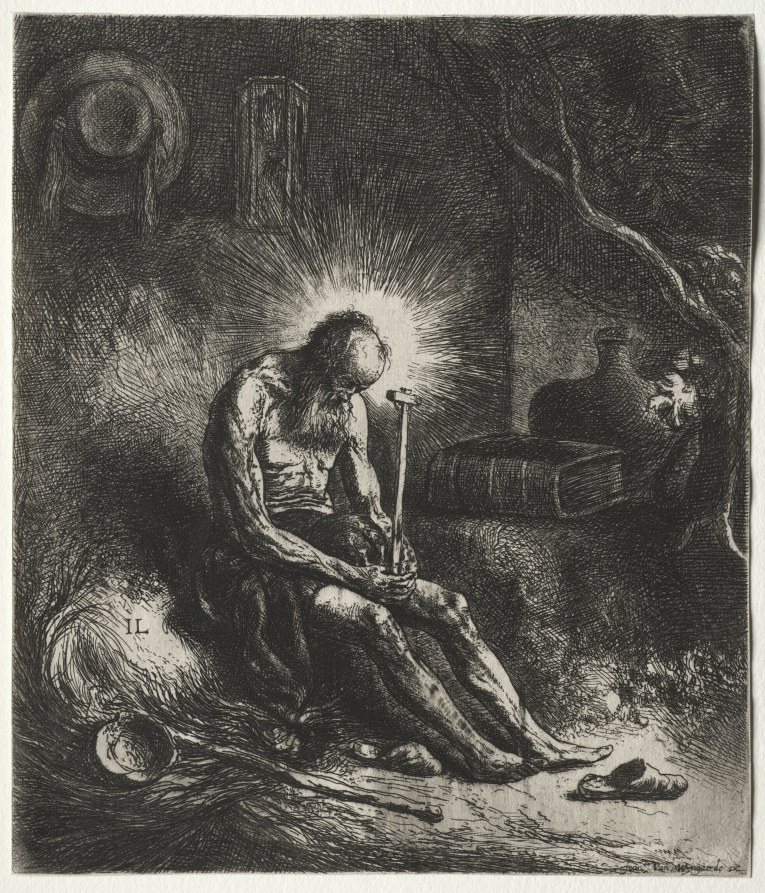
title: St. Jerome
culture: Netherlands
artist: Jan Lievens (Dutch, 1607–1674)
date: 1631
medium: etching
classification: Print